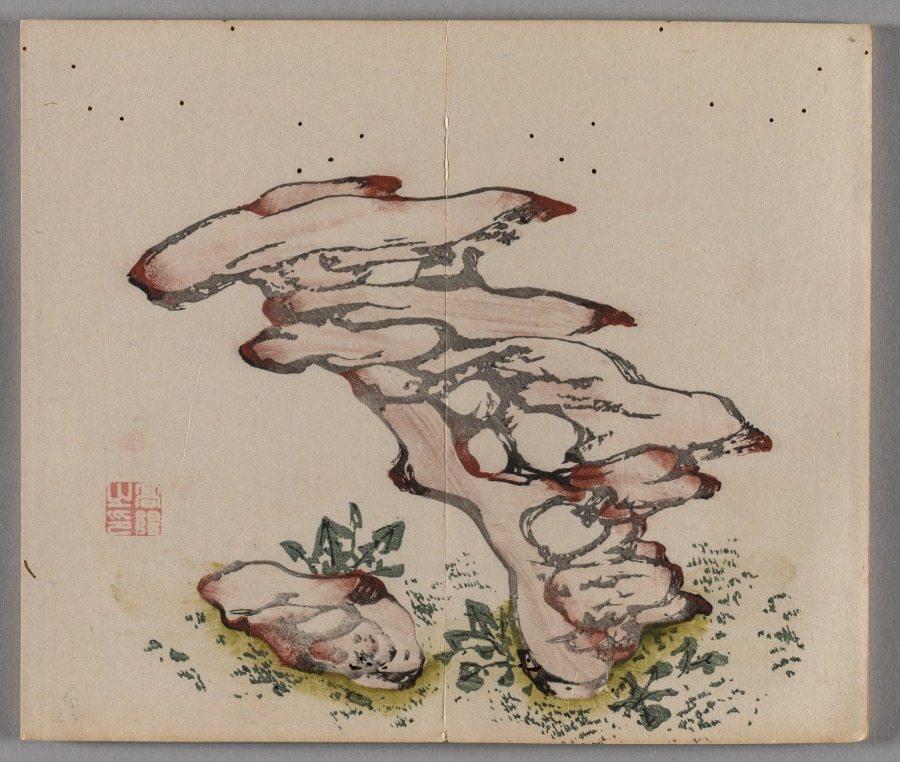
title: Ten Bamboo Studio Painting and Calligraphy Handbook (Shizhuzhai shuhua pu): Rocks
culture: China, Qing dynasty (1644-1911)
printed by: Hu Zhengyan (Chinese, c. 1584–1674)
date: 1633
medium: Woodblock-printed book; ink and colors on paper; first edition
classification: Print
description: Color printing reached a level of perfection in the early 1600s, as seen in this Ten Bamboo Studio Collection of Calligraphy and Painting and the Mustard Seed Garden Manual of Painting (printed 1679 and 1701). The painterly quality, precision in registering (aligning) the woodblocks, and harmonious colors made them the most successful color print editions in Chinese history. Both editions were printed and compiled in Nanjing, spread nationwide, and had a great impact on the arts in Japan and Korea.